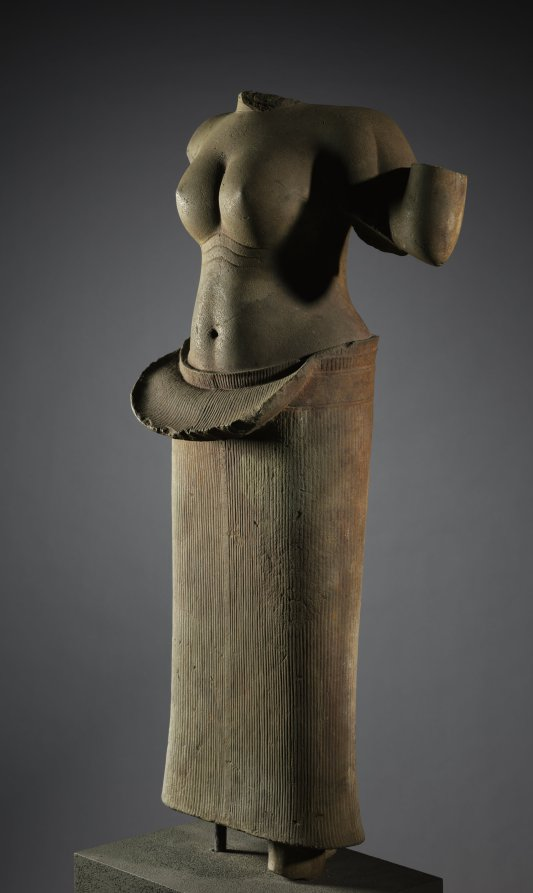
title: Standing Female Deity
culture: Cambodia, Angkor, Bakheng, 10th century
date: 900s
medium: stone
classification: Sculpture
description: This four-armed deity wears a sarong skirt, with its pleated end folded over the belt, as was the fashionable Bakheng style during this period. The incised lines beneath the breasts indicated folds of flesh as marks of beauty. This figure relates to the sculptures of the Phnom Bakheng, a temple dedicated to Shiva.